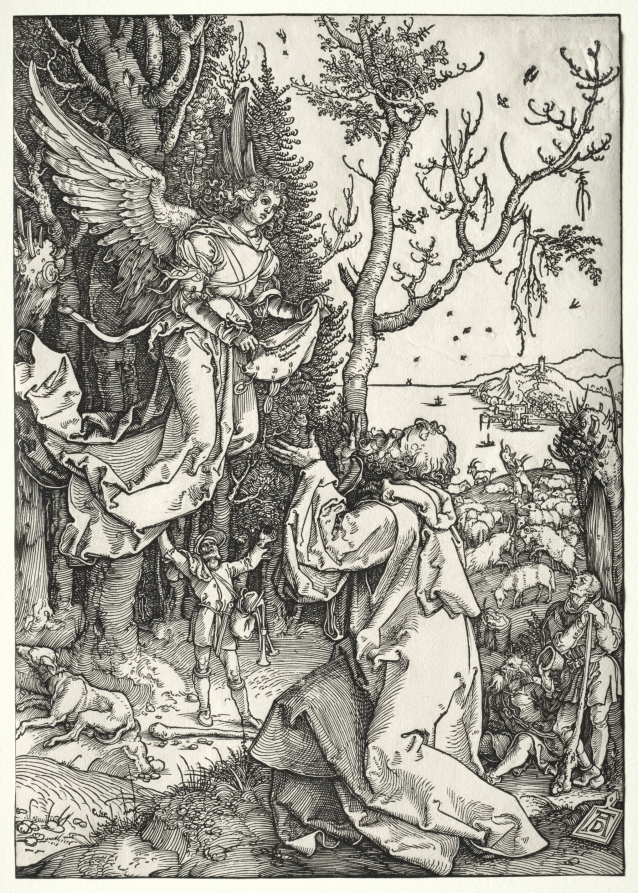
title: Joachim and the Angel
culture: Germany, early 16th Century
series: The Life of the Virgin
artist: Albrecht Dürer (German, 1471–1528)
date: c. 1504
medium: woodcut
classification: Print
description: The first three woodcuts of Dürer’s narrative (1959.99.2-4) portray the events leading up to the Virgin’s birth. According to an apocryphal text, Mary’s parents, Joachim and Anna, had remained childless into old age. After Joachim’s offering at the temple was rejected for this reason, the angel Gabriel appeared to him in the wilderness to announce that his wife would soon bear a child. At this news, the two tenderly embraced at the city’s gate.